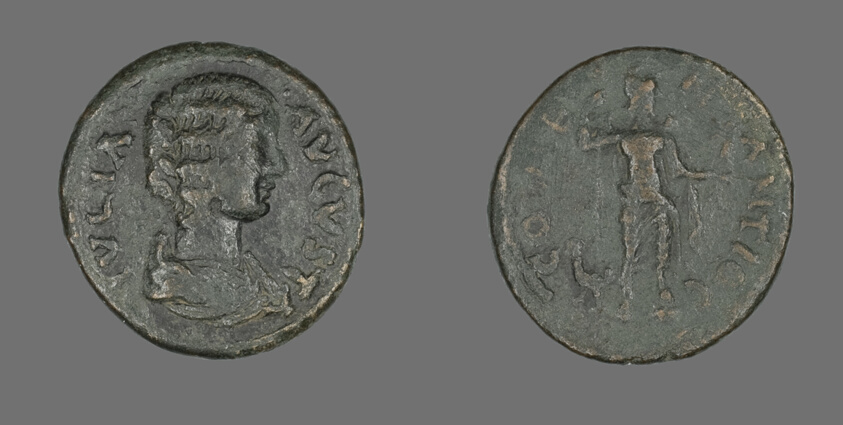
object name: Coin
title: Coin Portraying Julia Domna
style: roman (ancient, style or period)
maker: Roman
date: 193-217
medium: Bronze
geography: Roman Empire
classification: coin; ancient art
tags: portrait, female